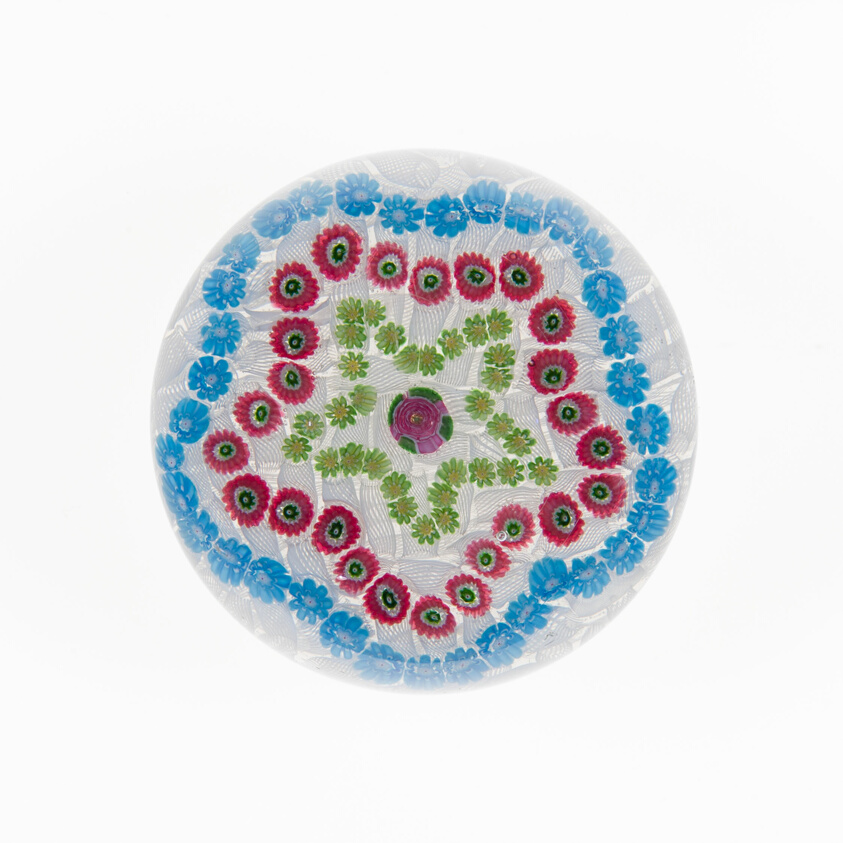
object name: Glass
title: Paperweight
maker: Clichy Glassworks (Cristalleries de Clichy); Clichy, France, 1837-1885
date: c. 1845–60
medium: Glass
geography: Clichy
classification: paperweight; glass